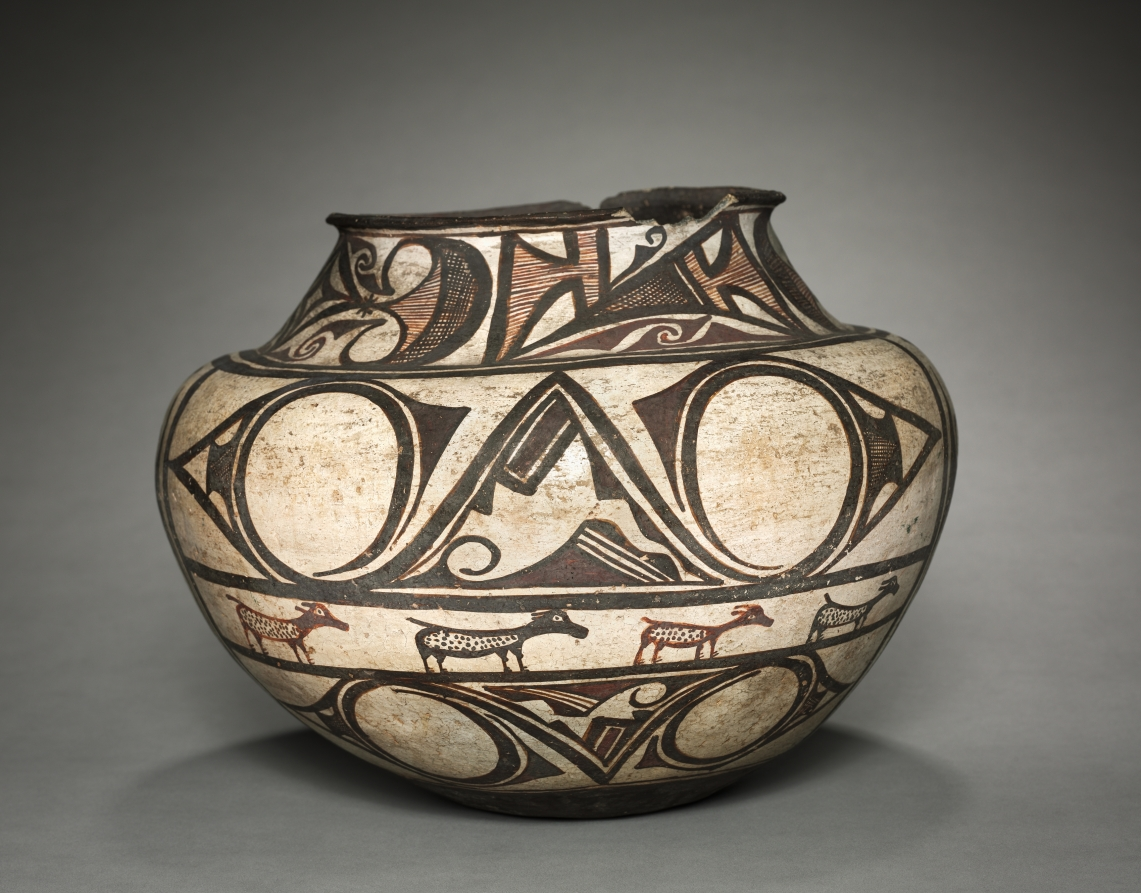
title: Water Jar (Olla)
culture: Southwest,Pueblo, Zuni, Post-Contact Period, late 19th century - early 20th century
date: 1880–1900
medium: ceramic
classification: Ceramic